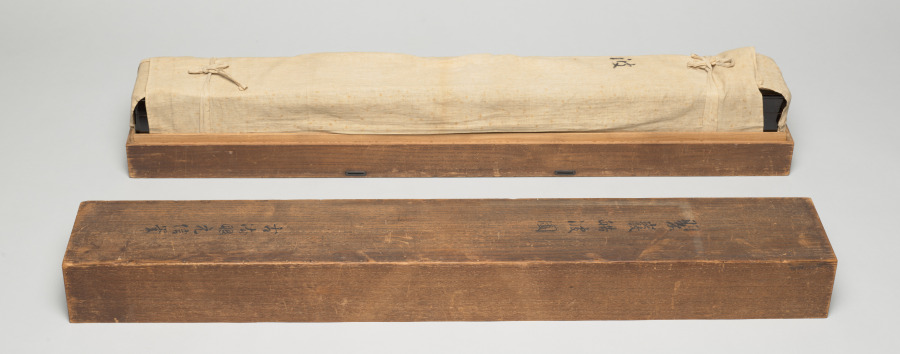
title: Rocks and Waves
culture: Japan, Muromachi period (1392–1573)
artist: attributed to Kano Motonobu (Japanese, c. 1476–1559)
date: early to mid-1500s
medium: sliding door fragment mounted as a hanging scroll; ink and gold wash on paper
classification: Painting